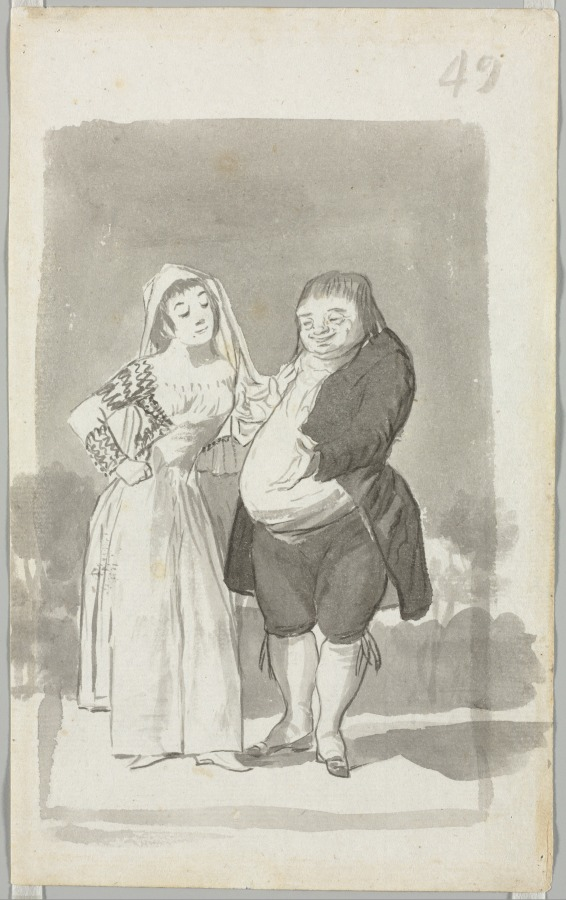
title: Young Woman (possibly a Sex Worker) with a Man (recto); Young Woman Wringing Her Hands over a Man's Naked Body (verso)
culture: Spain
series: Madrid Album "B"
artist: Francisco de Goya (Spanish, 1746–1828)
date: 1796–97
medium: brush and gray and black washes on laid paper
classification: Drawing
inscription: recto: by artist, upper right, in gray wash: 49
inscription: verso: by artist, upper left, in gray wash: 50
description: Among the great figures of the pictorial arts in the West, Francisco de Goya is one of the very few whose work as a graphic artist is arguably even more important than his paintings. Alongside a prodigious output of prints, he created eight sketchbooks of drawings over the course of 30 years. This double-sided sheet comes from the so-called Album B, or Madrid Album, which, like all of them, was scattered throughout the world in public and private collections after his death. The drawings reveal Goya’s powers of invention and observation, and his biting satire. On the recto side of the sheet, a vulgar encounter between a prostitute and a pot-bellied lecher reveals the bluntness of the Goya’s social criticism. The verso drawing is less easily pinned down, though it follows traditional iconography for representations of Saint Margaret of Cortona, a nobleman’s mistress who repented and entered a convent after her lover’s dog led her to his murdered corpse.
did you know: Much of Francisco de Goya's graphic output of drawings and prints was not made public until well after his death.